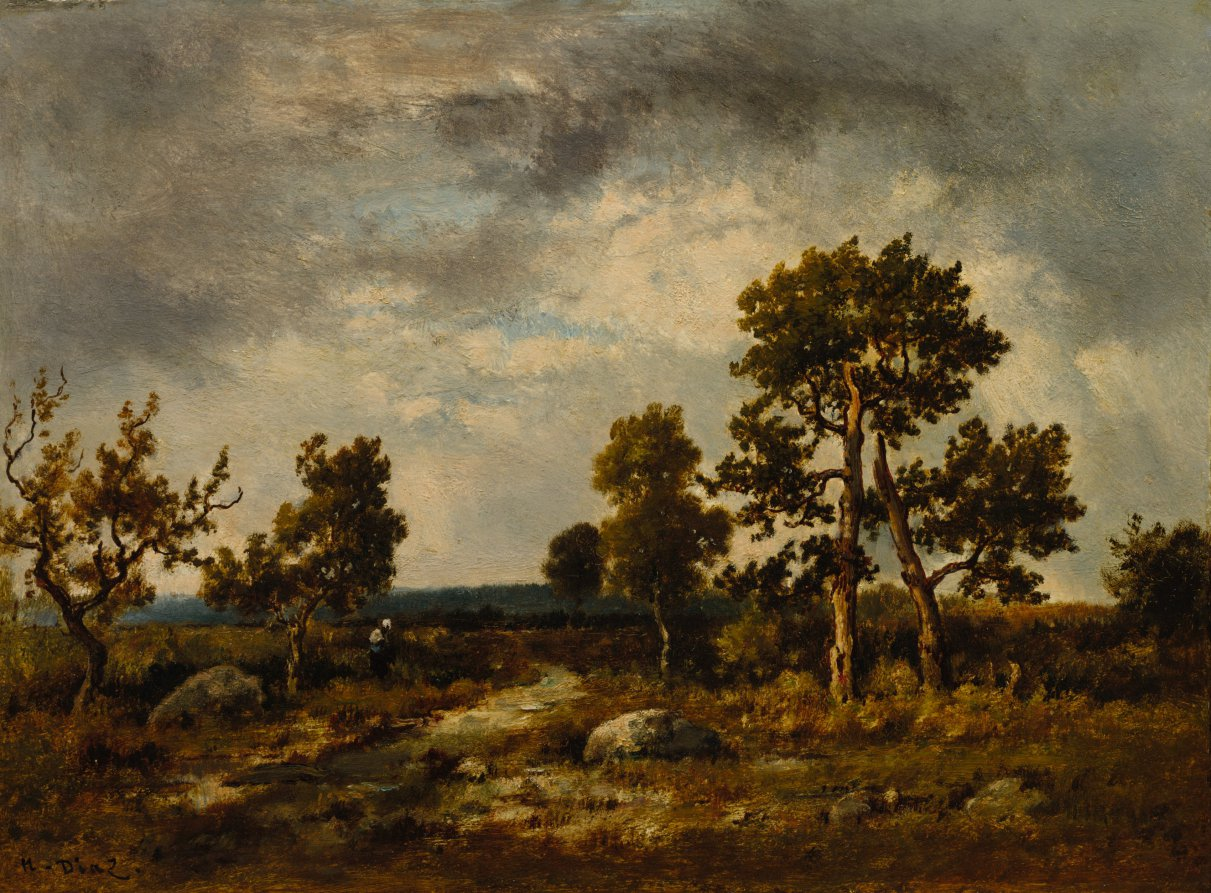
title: Path Near the Pond of Vipers, Fontainebleau Forest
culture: France, 19th century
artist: Narcisse Diaz de la Peña (French, 1807–1876)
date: c. 1860s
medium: oil on wood panel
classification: Painting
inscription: Signed lower left: N. Diaz